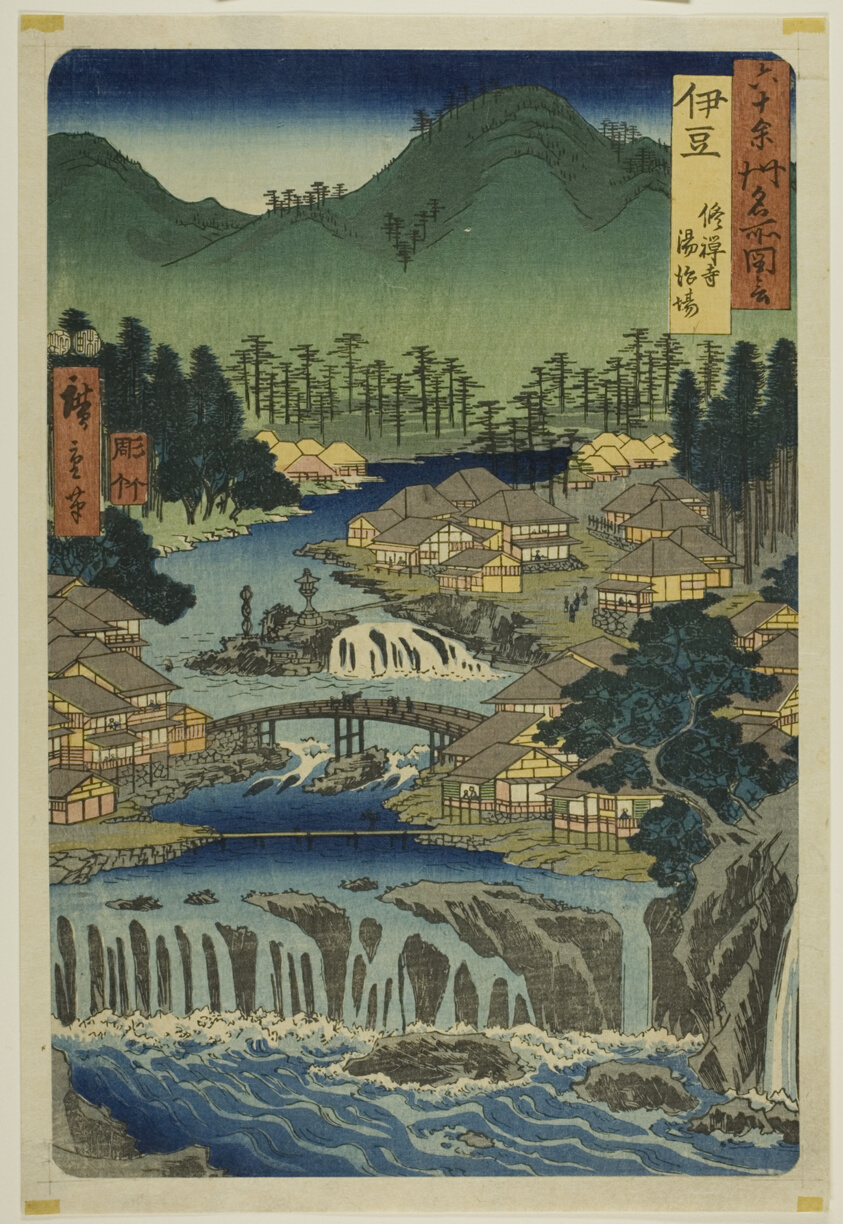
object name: Print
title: Izu Province: Hot Springs of the Shuzen Temple (Izu, Shuzenji tojiba), from the series "Famous Places in the Sixty-odd Provinces (Rokujuyoshu meisho zue)"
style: Japanese (culture or style)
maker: Utagawa Hiroshige 歌川 広重; Japanese, 1797–1858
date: 1853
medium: Color woodblock print; oban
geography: Japan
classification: woodblock print; print